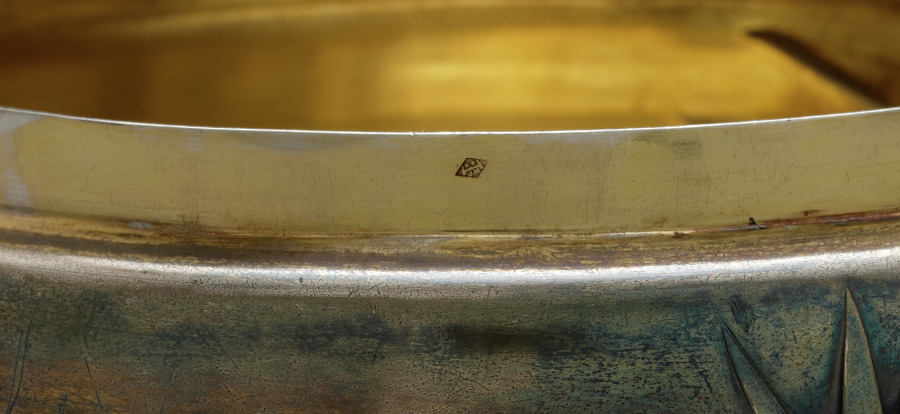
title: Box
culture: Sweden, 19th century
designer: Ingeborg Plockross-Iminger (Danish, 1872–1962)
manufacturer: Bing & Grøndahl (Danish, est. 1853)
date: c. 1850–1900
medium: porcelain, silver-gilt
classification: Sculpture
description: This figure featuring three monkeys was designed by the Danish ceramicist Ingeborg Plockross-Iminger. The figure is displayed with a French silver mount that references Japonisme and Art Nouveau styles that were popular at the end of the 1800s and experienced a resurgence in the 1920s because of increased importation of Japanese goods to the West.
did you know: This ceramic figure usually stands alone, without a silver mounting.